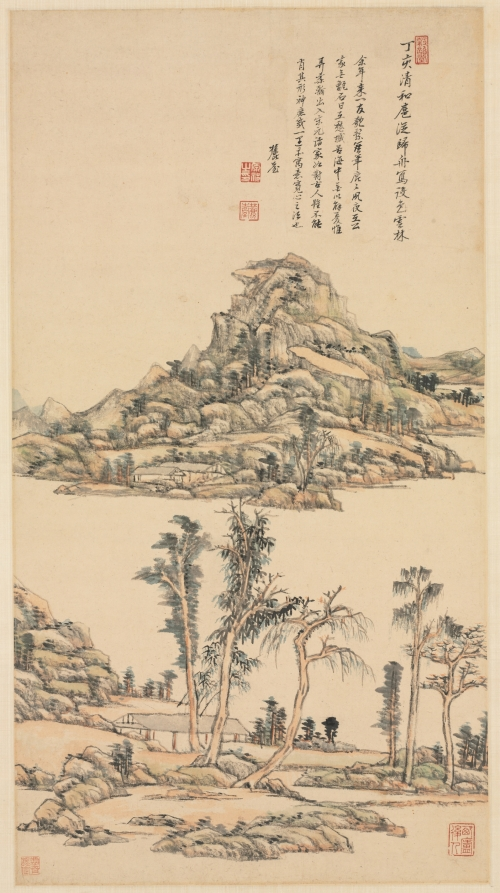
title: Landscape after Ni Zan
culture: China, Qing dynasty (1644–1911)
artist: Wang Yuanqi (Chinese, 1642–1715)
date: 1707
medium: Hanging scroll; ink and light color on paper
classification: Painting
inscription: [印]穀詒堂。 丁亥清和扈從歸舟寫設色雲林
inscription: 余年來一友匏系，簪筆鹿鹿。夙夜在公。家無甑石，日在愁城苦海中。無以解憂。惟弄柔翰出入宋元諸家，如對古人。雖不能肖其形神，庶幾一遇，亦寓意寬心之法也。麓臺。[印]原祁之印; 麓臺 [印, 右下]西廬後人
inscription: 1 additional seal of Pang Yuanji 龐元濟 (1864–1949) at the lower left corner.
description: Wang Yuanqi, an official in Emperor Kangxi’s (reigned 1662–1722) court, grew up in an artistic family. Like other mainstream painters of the Orthodox School, he followed a canon of earlier styles and artists endorsed by Ming calligrapher Dong Qichang (1555–1636). Here, Wang drew inspiration from Ni Zan (1301–1374), a Yuan dynasty painter known for his simple compositions and spare use of ink. Master Ni seldom used color, but Wang added green and ochre washes to the trees, cottages, and hills in this landscape. Painting was a way for Wang to relieve the pressures of his official duties.